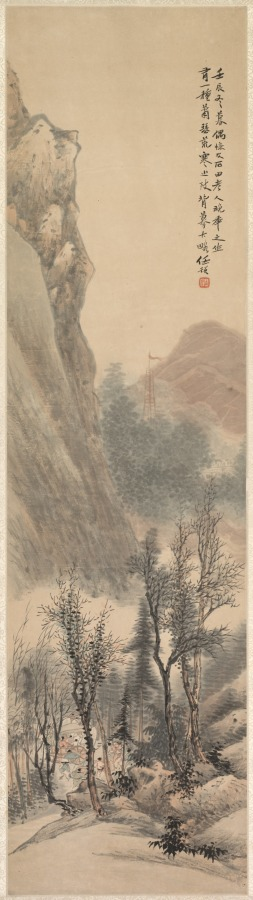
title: Landscape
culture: China, Qing dynasty (1644-1911)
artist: Ren Yu (Chinese, 1853–1901)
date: 1892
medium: Hanging scroll; color on paper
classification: Painting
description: This seasonal landscape is from a set of four hanging scrolls by Ren Yu. He was the youngest, most eccentric, and least prolific of the Four Rens, a family of prominent painters in Shanghai during the late Qing dynasty (1644–1911). Perhaps due to his opium habit and subsequent financial difficulties, Ren Yu tended to be lackadaisical in his work. The few remaining high-quality paintings hint at his artistic potential lost to opium. Though Ren’s premature death left his artistic promise unfulfilled, his paintings were acquired and donated to the museum by Charles Lang Freer (1854–1919), a wealthy businessman and art collector from Detroit. As Freer had hoped, this donation of Ren Yu paintings inspired the young Cleveland Museum of Art to continue to expand its own Chinese painting collection.